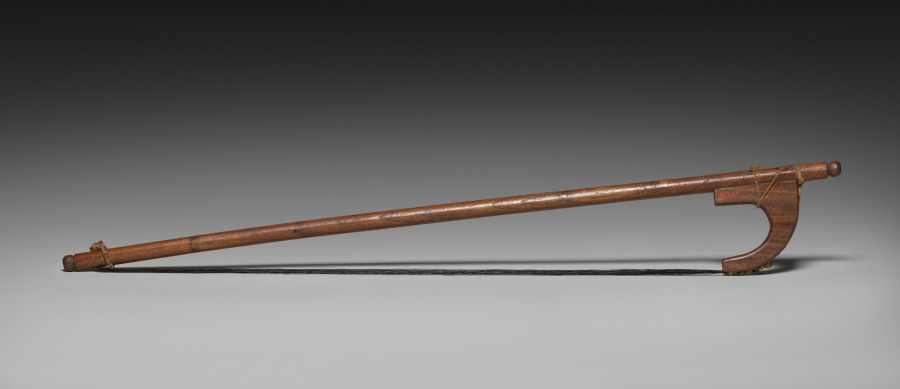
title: Bow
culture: India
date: 1800s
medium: Wood, horsehair, and jute fiber cord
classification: Musical Instrument